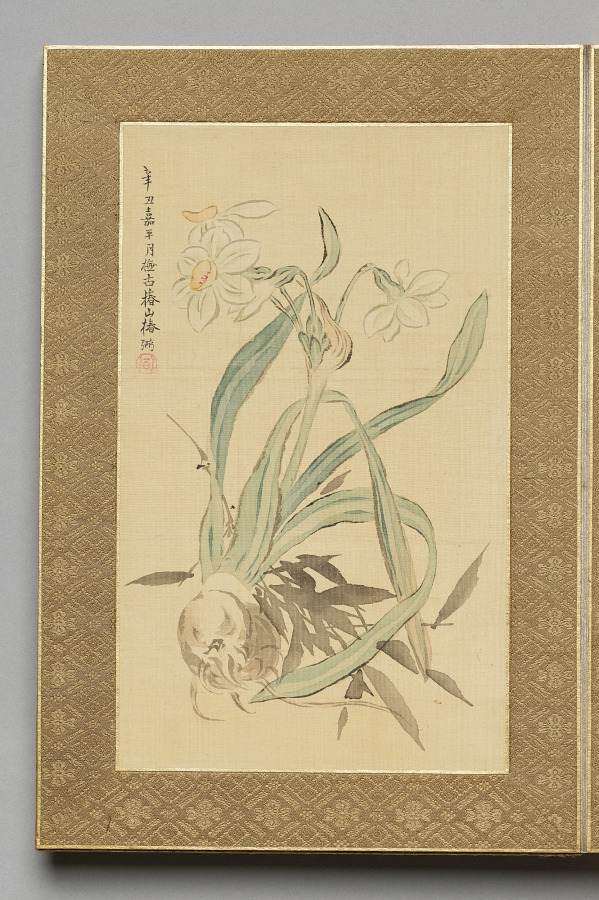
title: Painting from Flowers and Grasses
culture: Japan, Edo period (1615–1868)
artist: Tsubaki Chinzan (Japanese, 1801–1854)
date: 1841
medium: album; ink and color on silk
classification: Painting